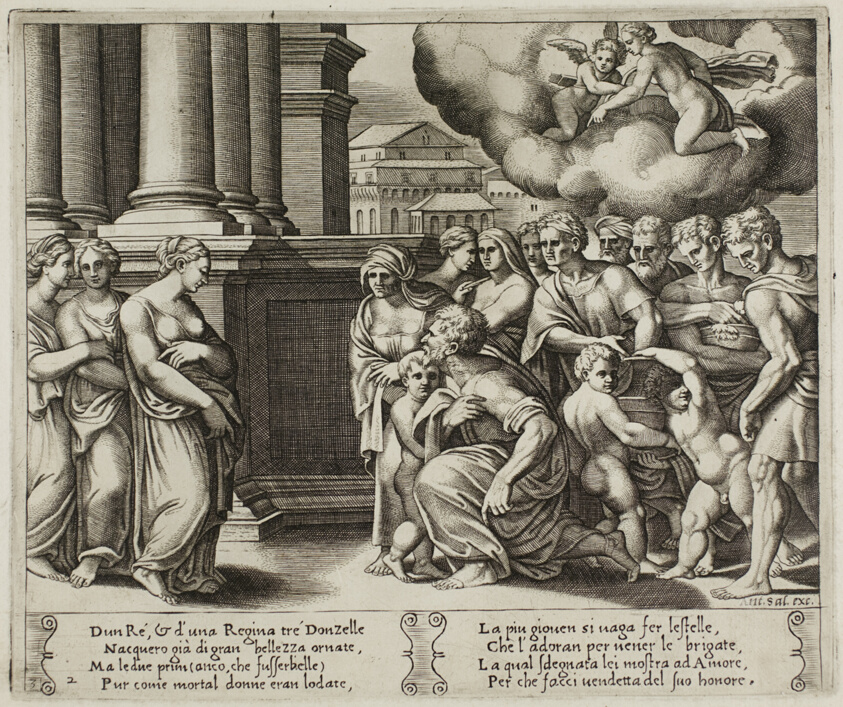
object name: Print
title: The People Rendering Divine Honors to Psyche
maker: Master of the Die (Italian, active c. 1530-1560); after Michiel Coxcie I (Flemish, 1499-1592); in turn, inspired by Raffaello Sanzio, called Raphael (Italian, 1483-1520)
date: 1530/40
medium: Engraving in warm brown ink on cream laid paper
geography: Italy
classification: engraving; print; prints and drawing